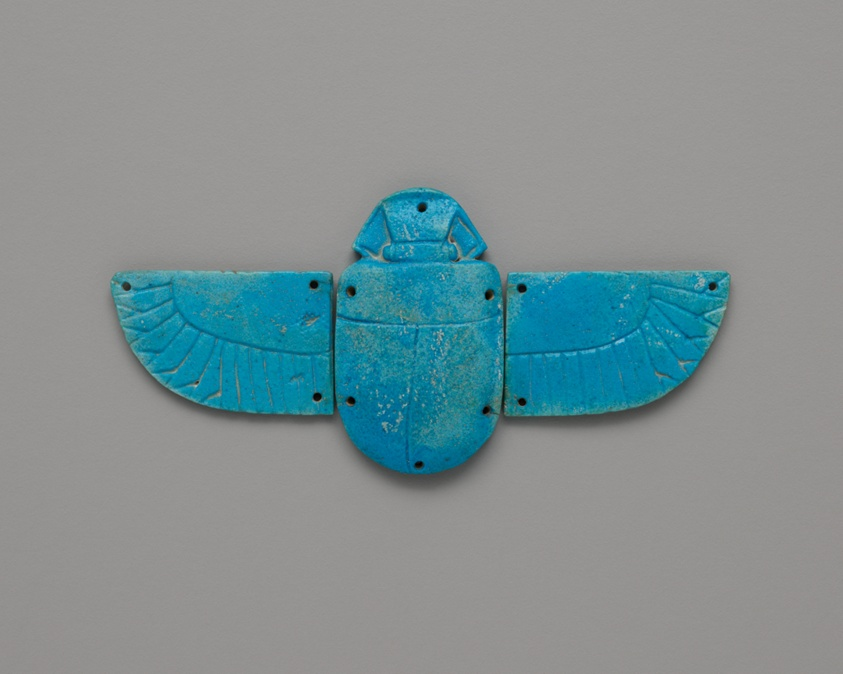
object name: Funerary Object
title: Winged Scarab Amulet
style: late period (egyptian), egyptian, ancient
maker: Egyptian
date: Late Period, Dynasty 26 (664–525 BCE)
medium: Faience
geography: Egypt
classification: scarab; ceramics; amulet; ancient art; faïence (composite material)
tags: insects, wings